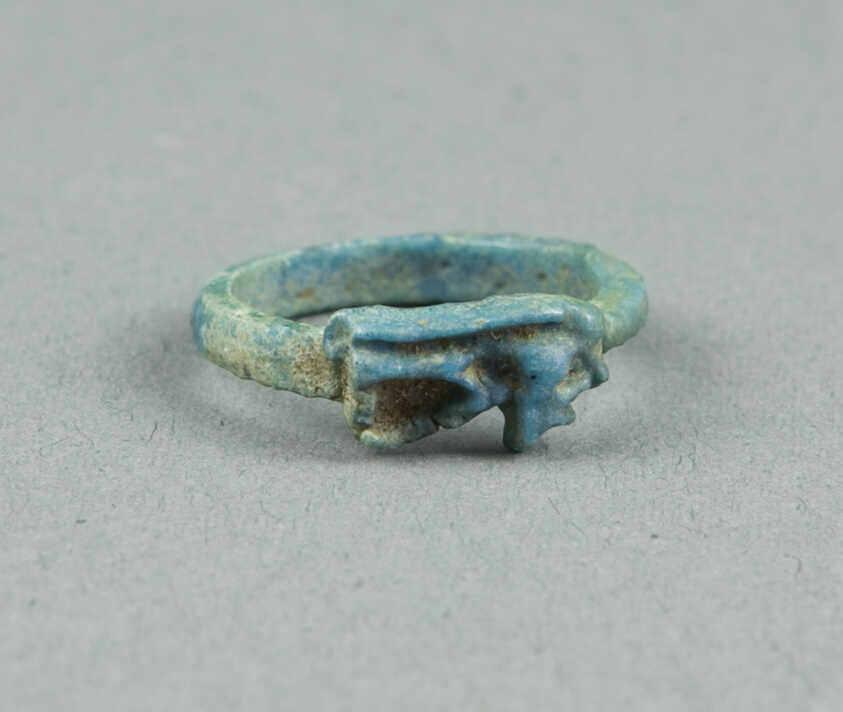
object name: Costume and Accessories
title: Eye of Horus (Wedjat) Finger Ring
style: new kingdom, egyptian, ancient, eighteenth dynasty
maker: Egyptian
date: New Kingdom, late Dynasty 18 (about 1325 BCE)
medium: Faience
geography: Egypt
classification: ring (jewelry); ceramics; jewelry; ancient art; costume; faïence (composite material)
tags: eye of Horus